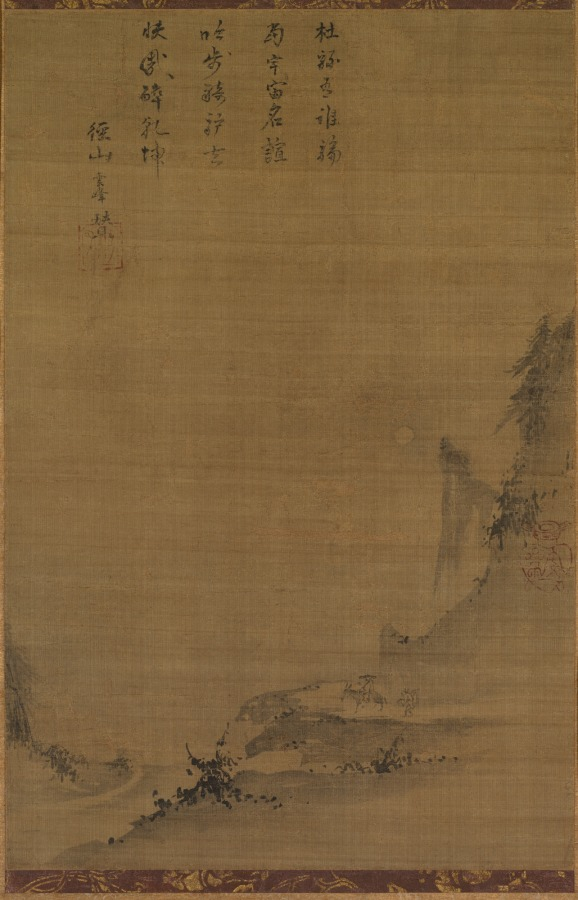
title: Mountain Landscape in Moonlight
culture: China, Southern Song dynasty (1127–1279) to Yuan dynasty (1271–1368)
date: 1200s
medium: hanging scroll; ink on silk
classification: Painting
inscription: 2 unidentified seals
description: Painted in modulated monochrome ink washes with dark dots for foliate accents, the anonymous artist successfully suggests the dense atmosphere of a warm summer night. Under a full moon a scholar rides a mule, accompanied by a servant who carries his belongings. The poem inscribed by Chan (Zen) priest Yunfeng Miaogao identifies the figure as the Tang dynasty poet Du Fu 杜甫 (712–770). Who rides Du [Fu]'s mule: Through the universe his name resounds. Chanting poems as he rides off on his mule, How quickly does he become drunk with Heaven and Earth!